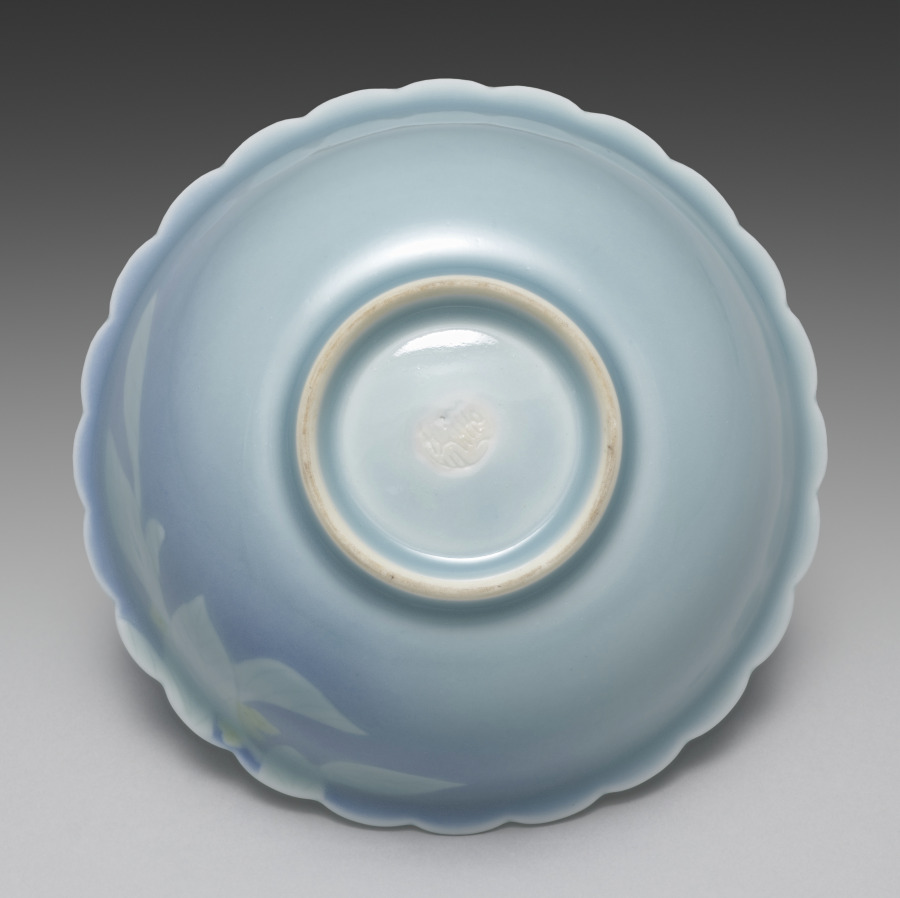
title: Dish from Dishes with Flowers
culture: Japan, Taishō period (1912–26) or Shōwa period (1926–89)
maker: Seifū Yohei IV (Japanese, 1872–1951)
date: 1914–46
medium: One from a set of five dishes; porcelain with underglaze yellow and blue glaze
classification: Ceramic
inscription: 清風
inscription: 清風造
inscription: 成山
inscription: 清風盧人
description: One can imagine a cool summer breeze when looking upon this set of dishes, each shaped with a crenulated mouth and glazed with blue. Around the rim and into the basin, the bowls have low-relief designs of flowers with underglaze yellow petals; their leaves and stems show white through the glaze. On each dish, the design continues over the rim onto one side.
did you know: Seifū Yohei IV’s dishes with flowers feature underglaze yellow.